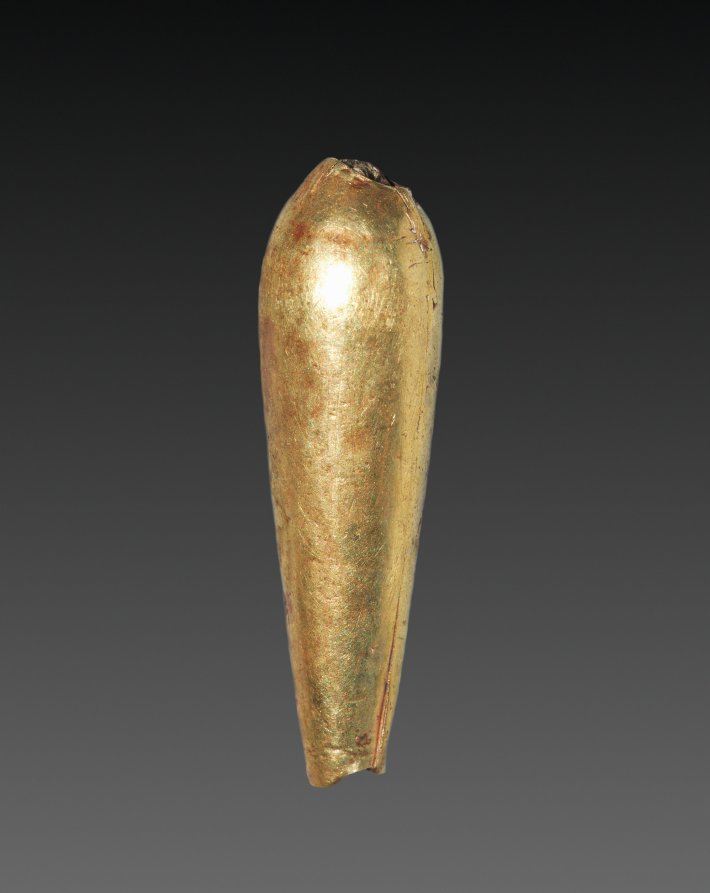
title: Teardrop-Shaped Bead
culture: Egypt, Middle Kingdom (2040–1648 BCE), Dynasty 12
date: 1980–1801 BCE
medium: gold over calcite gesso core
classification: Jewelry